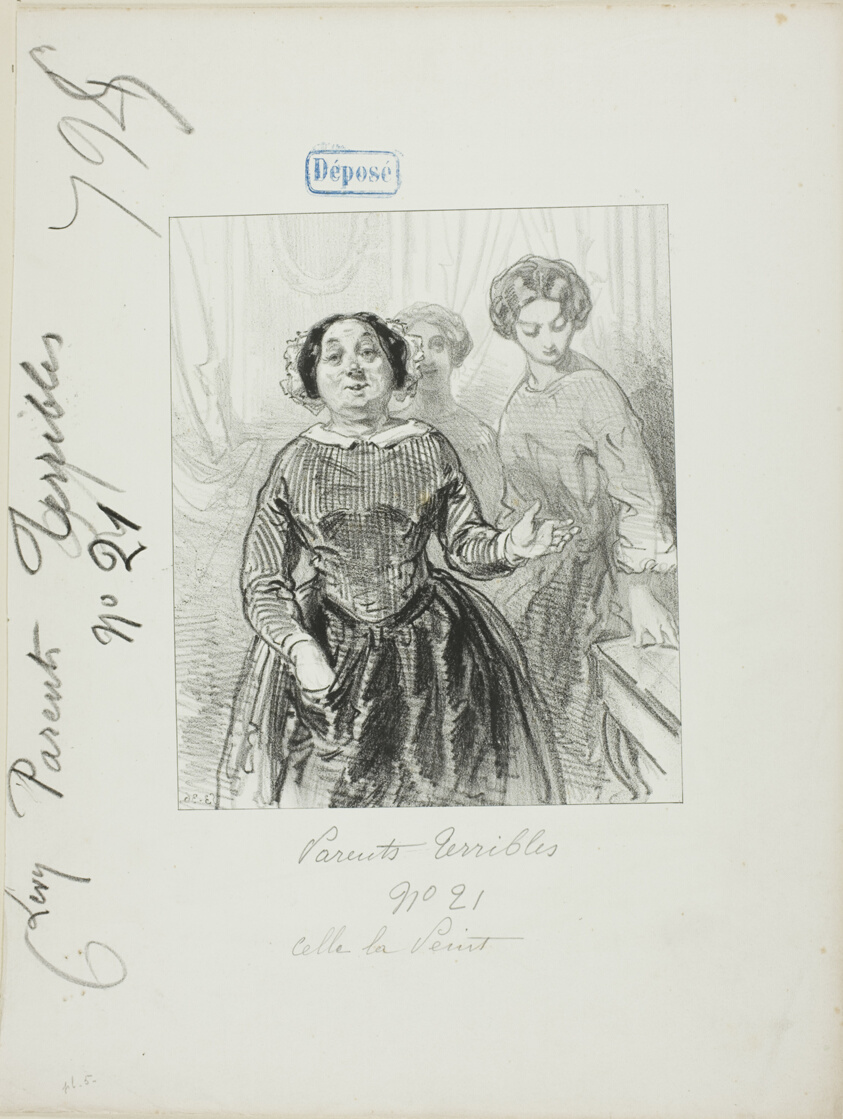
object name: Print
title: Les-Parents-Terribles series: This one paints...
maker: Paul Gavarni (French, 1804-1866)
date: 1852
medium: Lithograph in black on cream wove paper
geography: France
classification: lithograph; print; prints and drawing